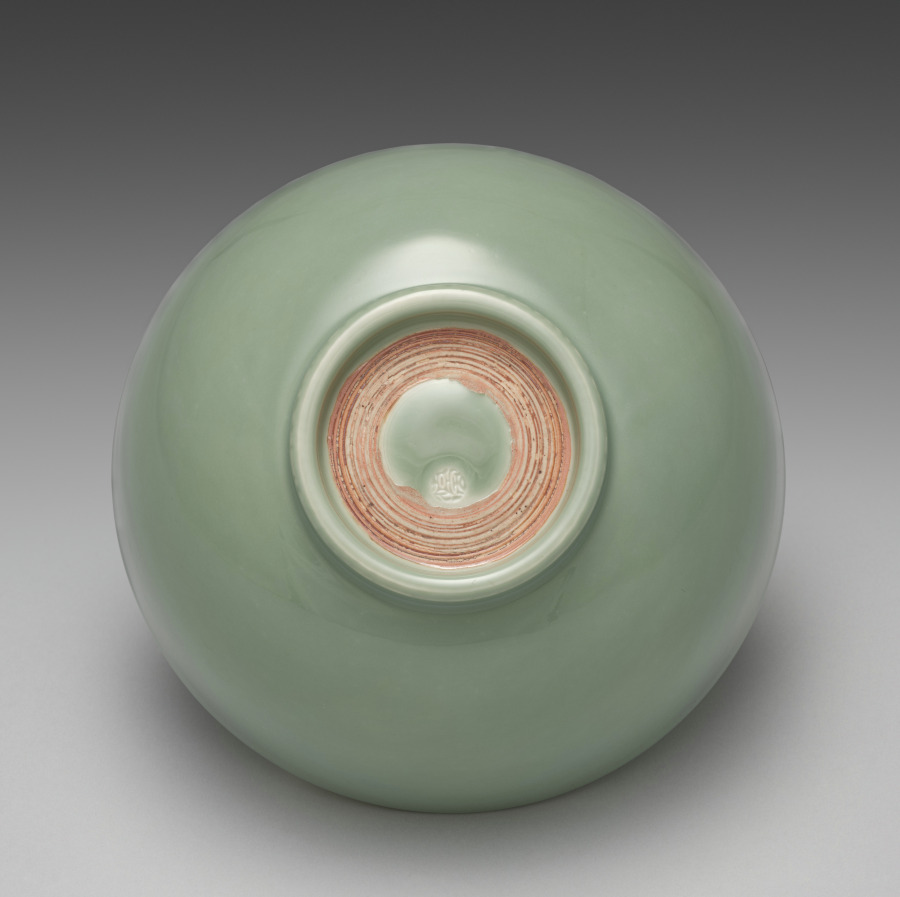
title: Sweets Bowl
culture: Japan, Meiji period (1868–1912)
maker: Seifū Yohei III (Japanese, 1851–1914)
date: 1893–1914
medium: Porcelain with green glaze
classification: Ceramic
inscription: 彫銘：清風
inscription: 共箱の箱書：（蓋裏）秘色窯菓子鉢 三世清風晟山作（印：帝室技藝員）襲（袭）四世清風與平識之（印：清風）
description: The box for this sweets bowl has an attestation by Yohei IV that it is a work by Yohei III and in the hisokuyō (C. mise yao), or “mysterious color ware,” style. In fact, as actual examples of mise ware were unknown in Yohei III’s time, he would have associated the color with the green-glazed ceramics of kilns at Longquan, also in Zhejiang Province, produced during the Yuan dynasty.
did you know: Many ceramics created by the Seifū Studio refer to and emulate Chinese ceramics in form and glazing.